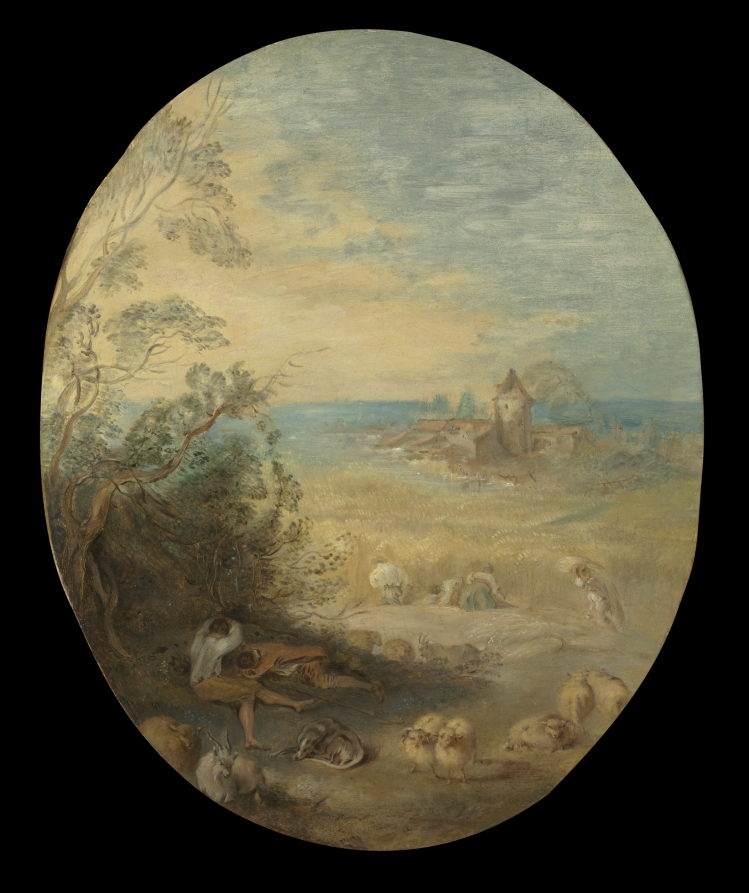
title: Summer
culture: France, 18th century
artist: Jean-Baptiste Pater (French, 1695–1736)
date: c. 1720–1736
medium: oil on canvas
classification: Painting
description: Spring and Summer are two scenes from a series of the four seasons. Both Autumn and Winter are now in the Museu d'Art de Catalunya in Barcelona. These landscapes were originally a part of a screen or a decorative panel, as indicated by their floral borders and oval shape. The setting of Spring is believed to be the grounds of Montmorency, the country estate of Pierre Crozat (1665-1740), a wealthy financier and art collector in early eighteenth-century Paris. The walkway is very similar to other scenes by Watteau known to depict the estate of his close friend and patron Crozat. As a student of Watteau, Pater would have also been familiar with this setting. Summer counters Spring's aristocratic leisure by depicting rural labor. However, befitting the work's decorative origins, Pater's scene belongs to the tradition of the timeless pastoral. More idyllic than a statement about class differences, the reapers peacefully gather sheaves of wheat as shepherds rest with their flocks in the foreground.